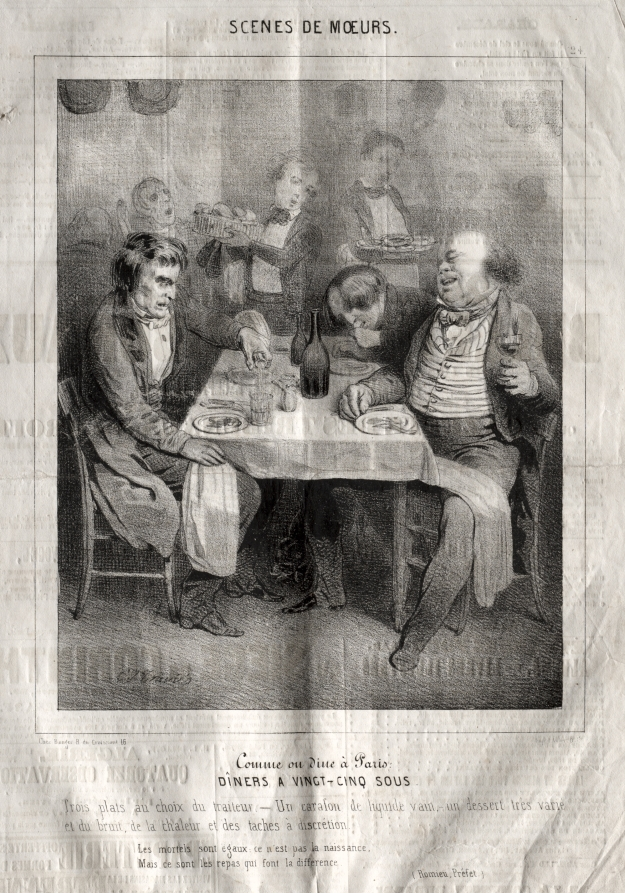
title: Scènes de moeurs: Comme ou dine à Paris. Diners a vingt-cing sous. Trois plates au choix du traiteur...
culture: France, 19th century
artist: Charles Joseph Traviès de Villers (French, 1804–1859)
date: c. 1830–45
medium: lithograph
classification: Print